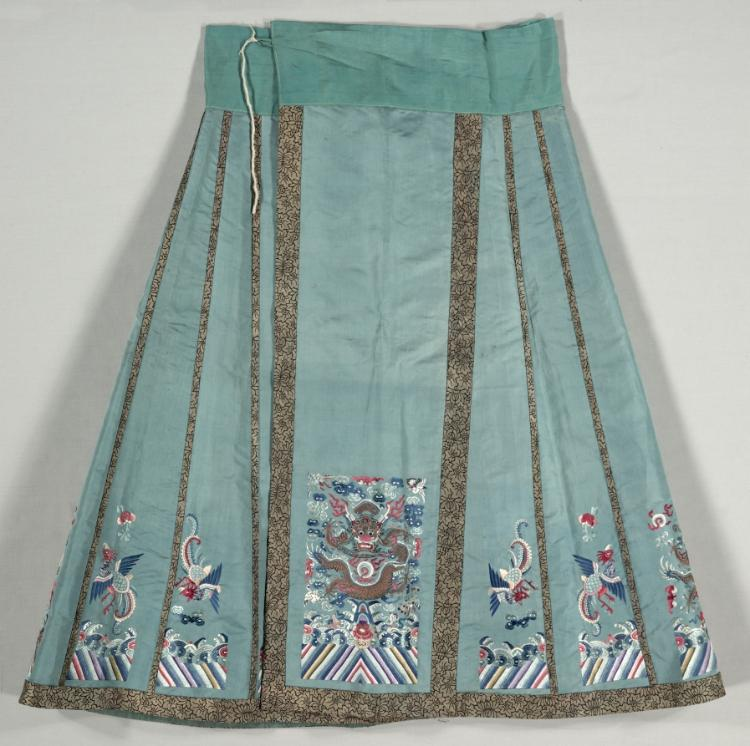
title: Woman's Bridal Dress, Pleated Skirt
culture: China, Qing dynasty (1644-1911)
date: 1800s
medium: Silk, gilt-metal thread; embroidery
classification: Garment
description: This three-piece bridal dress includes a dragon jacket, a pleated skirt, and a tabard, a short loose-fitting sleeveless vest. The ensemble reveals the high rank of her husband even though it did not fall under the scope of the Qing Dynasty sumptuary laws. The pleated turquoise skirt, with six embroidered panels that feature dragons in the front and back, would be worn beneath the red dragon jacket (2005.135.1).